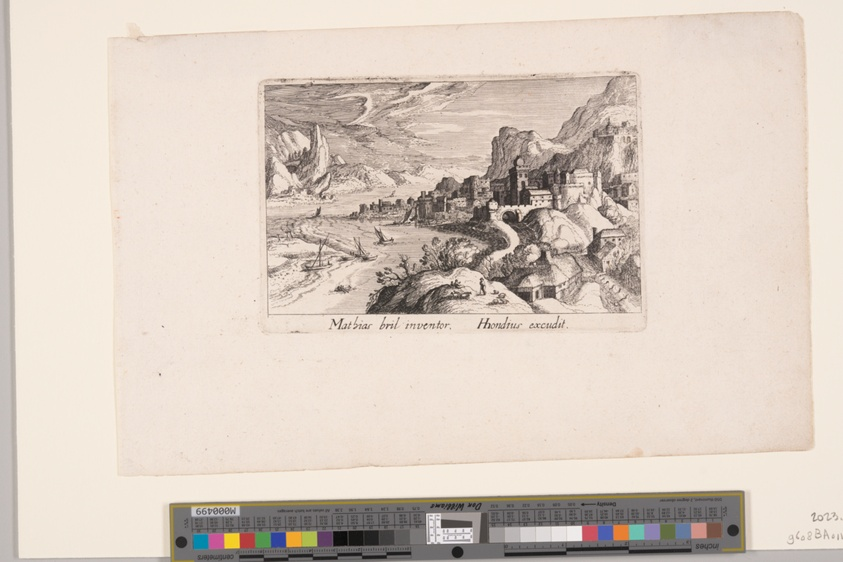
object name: Print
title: Alpine River Valley, from Topographia Variarum Regionum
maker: Simon Frisius (Dutch, c. 1580–1629); after Matthijs Bril (Flemish, 1550-1583)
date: 1614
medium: Etching on paper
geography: Netherlands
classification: etching; paper; print; prints and drawing